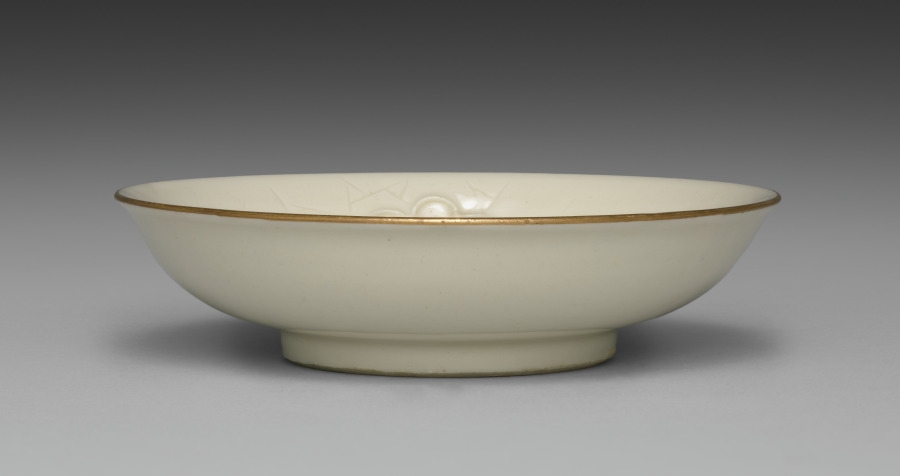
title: Small Dish from Dining Set with Plum Blossoms and Cracked-Ice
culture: Japan, Meiji period (1868–1912)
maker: Seifū Yohei II (Japanese, 1844–1878)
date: c. 1875–78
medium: Porcelain with molded designs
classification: Ceramic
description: Each item in this set has a delicate low-relief design of flowering plum branches over scattered, intersecting lines meant to resemble the cracked-ice surface of a frozen body of water and is signed on the base in gold pigment. While Yohei II produced many fine works in underglaze blue, like those produced by Kiyomizu Shichibei, he also made works in quite different styles later in his career, from the early 1870 s. In 1873, he was appointed purveyor to the Industrial Center of Kyoto Prefecture, a designation associated with Kyoto’s efforts to reach an international market through the port of Kobe; and from 1875 until his death, he was involved in national-level projects to present Japanese ceramics across the world. It was during this period that Yohei III was apprenticed to Yohei II, and it has been suggested that this set may in fact be an early example of Yohei III’s work, which he signed with his teacher’s name. Decorated with flowers resembling Japanese textile motifs, the set calls to mind the design of Yohei II’s pair of vases with plum blossoms in the Victoria and Albert Museum. Here, the elaborate trees created for a formal public exhibition setting have been translated into the approachable blossoms of the genteel domestic environment. While the designs are consistent across the pieces, each raised flower petal and pistil and each incised line in the ice was done by hand, so the cups, bowls, and dishes are similar yet unique. The bottoms of two boxes once identified the set’s owner, but the information has been deliberately obscured with black ink. However, inscriptions still visible appear to indicate two occasions, once at the end of July 1886 , and once again in June 1916 , when parts of the set were requested from Hokura in Niigata Prefecture. The location corresponds to a neighborhood in the present-day city of Jōetsu. The surname Tsuji 辻 also appears on a paper tag affixed to one of the box cloths. Future research may possibly reveal more about their provenance. A vase by Yohei III in a private collection combines the formal grandeur of the Yohei II vases in the Victoria and Albert Museum with the gentler design of this dining set, placing flowering plum trees against soft, scalloped-edge clouds resembling those in golden screens.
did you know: The dining wares have a creamy white coloration that the four boxes containing them identify as Korean in style.